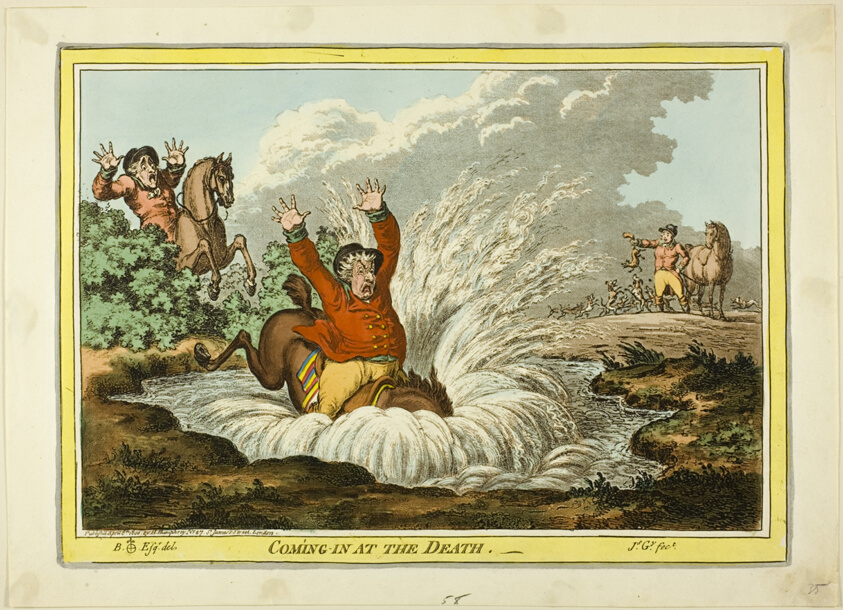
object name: Print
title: Coming in at the Death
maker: James Gillray (English, 1756-1815); after Brownlow North (English, 1778-1829)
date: published April 8, 1800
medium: Hand-colored etching on paper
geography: England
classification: etching; print; prints and drawing